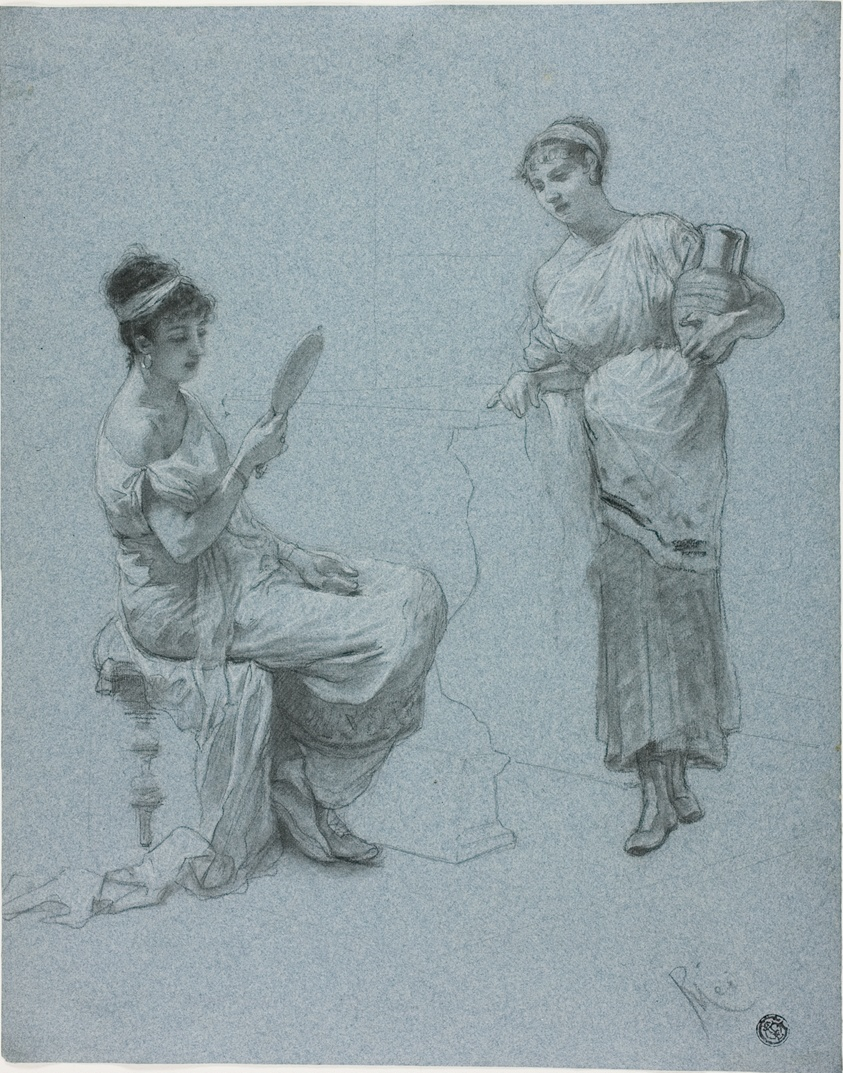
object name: Drawing and Watercolor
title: Two Ladies of Ancient Rome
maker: Paolo Mei (Italian, active 1893)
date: c. 1893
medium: Black chalk and charcoal, with stumping, with graphite, heightened with white chalk, on blue wove paper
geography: Italy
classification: charcoal; drawings (visual works); prints and drawing